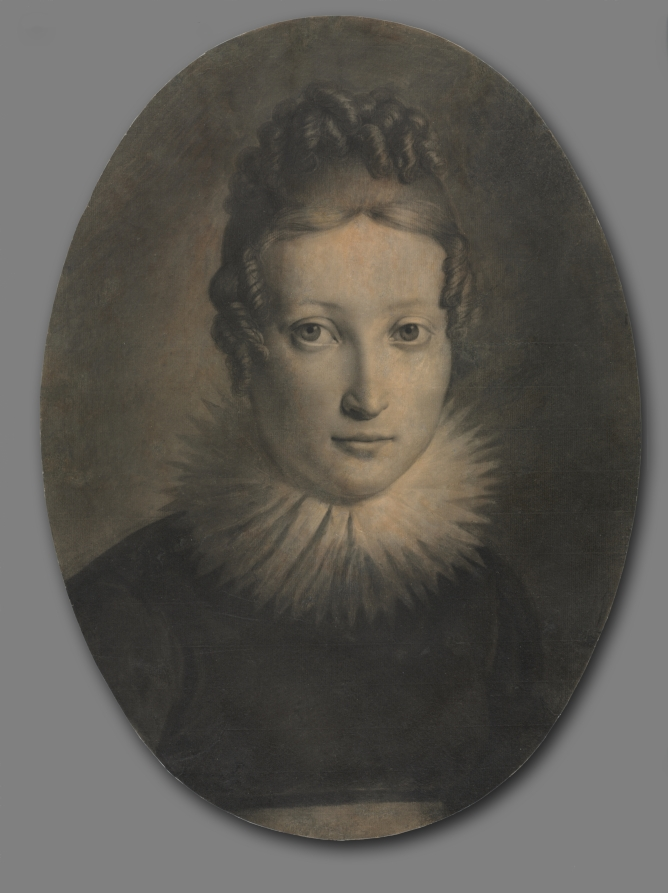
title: Portrait of Marie-Louise, Duchess of Parma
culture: France, 18th century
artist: François Gérard (French, 1770–1837)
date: c. 1810–1814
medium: graphite and black and brown ink wash with white heightening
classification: Drawing